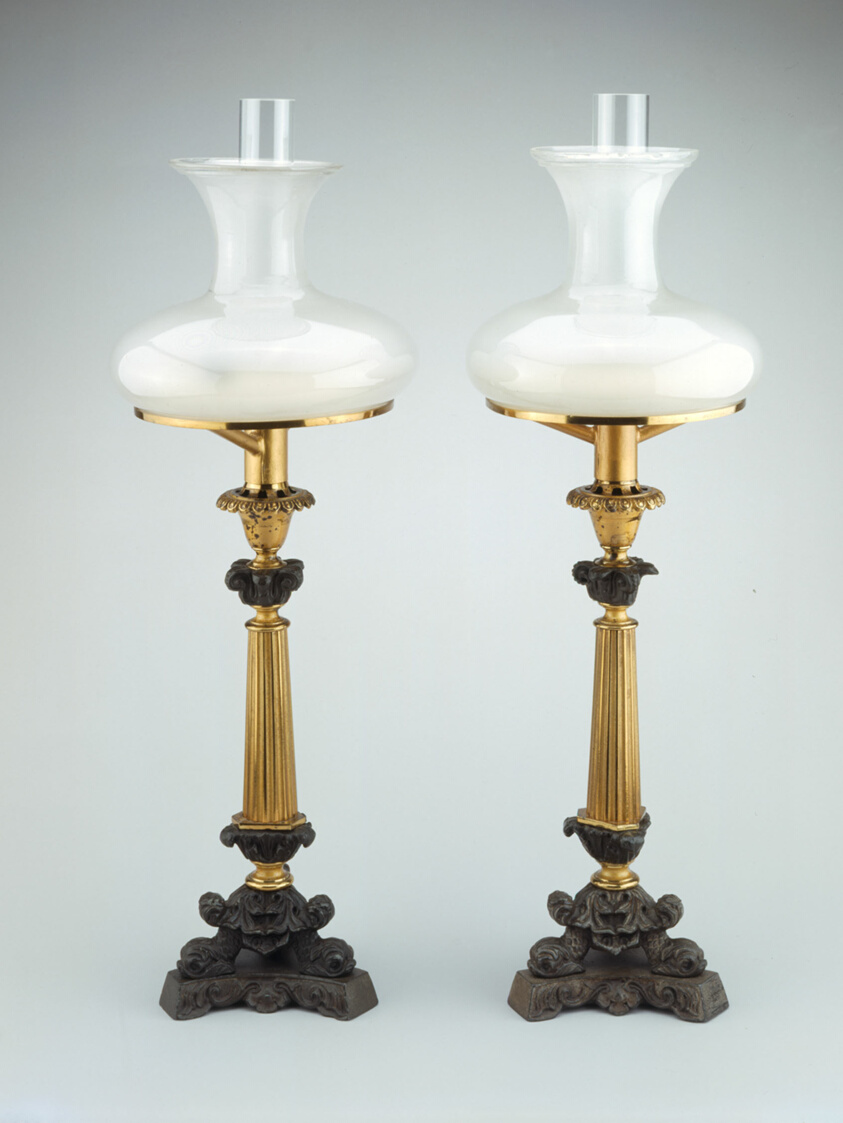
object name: Metalwork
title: Pair of Sinumbra Lamps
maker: Cornelius and Company (American, 1839–1851)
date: c. 1827–31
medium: Gilded brass, bronze, and glass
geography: Philadelphia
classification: lamp (lighting device); furniture accessory; american decorative arts; american arts; decorative arts